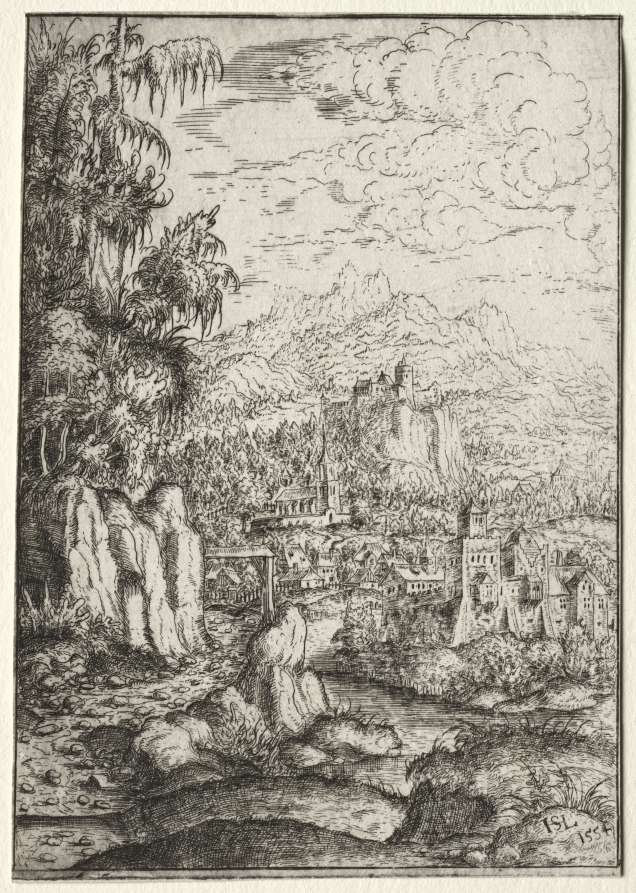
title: Landscape with a Road to a Castle on an Island in a River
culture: Germany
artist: Hanns Lautensack (German, 1524–1566)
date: 1554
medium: etching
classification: Print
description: Like Augustin Hirschvogel, Hanns Lautensack populated his images with traces of human activity that serve to characterize the features of the land rather than suggest a narrative. In several of his etchings, Lautensack used a vertical, rather than horizontal, format, emphasizing the strong verticals of mountainous terrain. This verticality was a particular feature of artists working in the Danube River valley and not often repeated by landscape artists in later centuries.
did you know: The print demonstrates the qualities of etching that appealed to Lautensack, namely, the freely drawn lines and spontaneity that was similar to drawing.